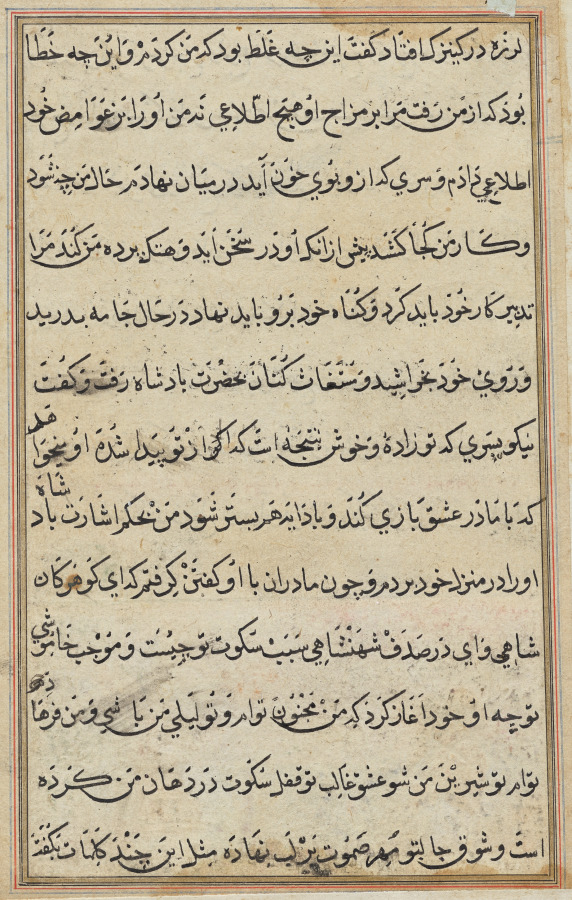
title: Page from Tales of a Parrot (Tuti-nama): text page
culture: Mughal India, court of Akbar (reigned 1556–1605)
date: c. 1560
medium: gum tempera, ink, and gold on paper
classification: Painting